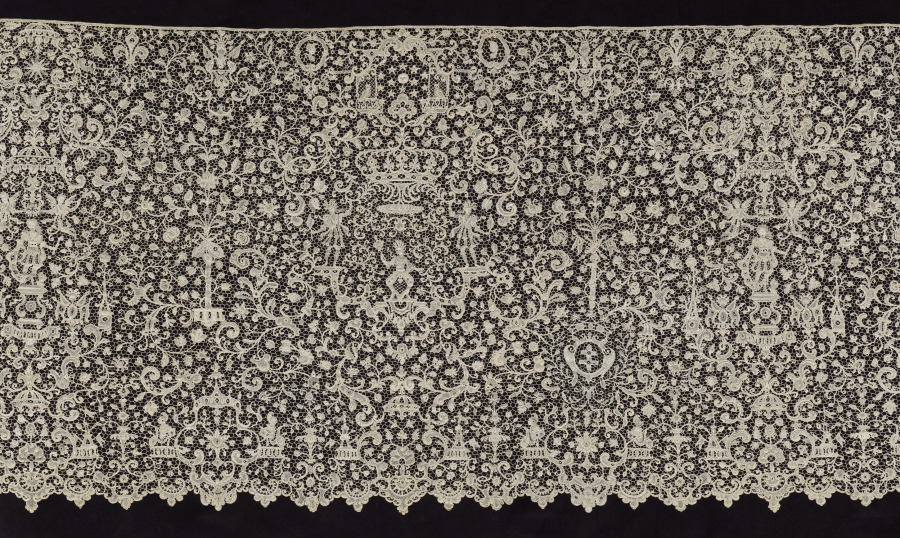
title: Lace Flounce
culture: France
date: 1700–1715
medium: Needle lace (Point de France)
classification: Lace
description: Other pieces of this lace (or ones very similar) are in the Rijksmuseum, Amsterdam; the Isabella Stewart Gardner Museum, Boston; and the Baltimore Museum of Art.